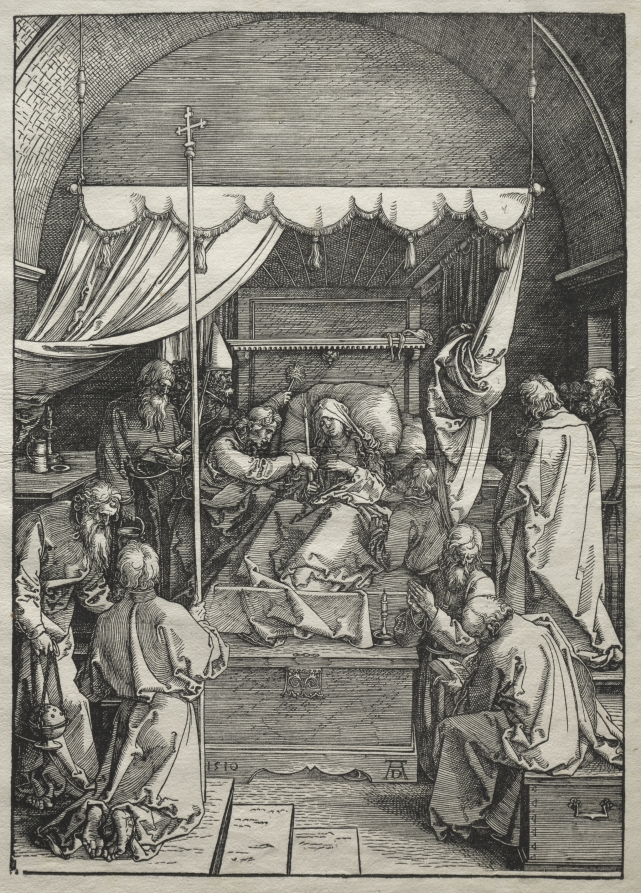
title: Life of the Virgin: The Death of the Virgin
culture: Germany, early 16th Century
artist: Albrecht Dürer (German, 1471–1528)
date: 1504–1505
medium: woodcut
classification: Print